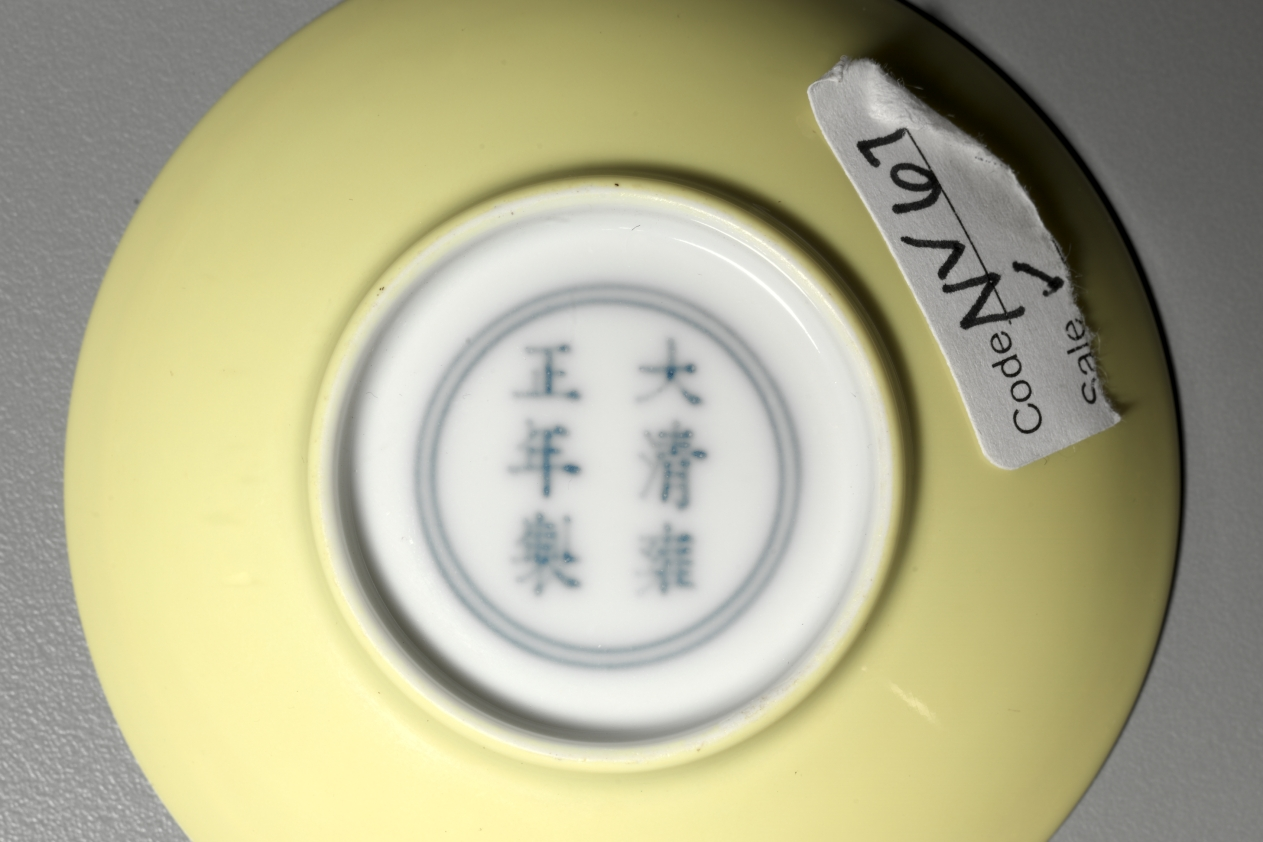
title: Small Dish with Yellow Monochrome Glaze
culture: China, Qing dynasty (1644-1911), Yongzheng mark and reign (1723-35)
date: 1723–35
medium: enameled porcelain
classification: Ceramic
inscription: 大清雍正年制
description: In the Qing dynasty (1644–1911), luxury items became more affordable to larger parts of the society, including women, merchants, and literati in non-official positions. Imperial patronage and a growing urban population encouraged consumption of luxury goods and local craftmanship. This enameled porcelain illustrates the the Qing dynasty accomplishments in porcelain techniques and the creative mind of the talented artisans who sought clients on a competitive market.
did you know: This monochromatic yellow dish was made for the imperial household.